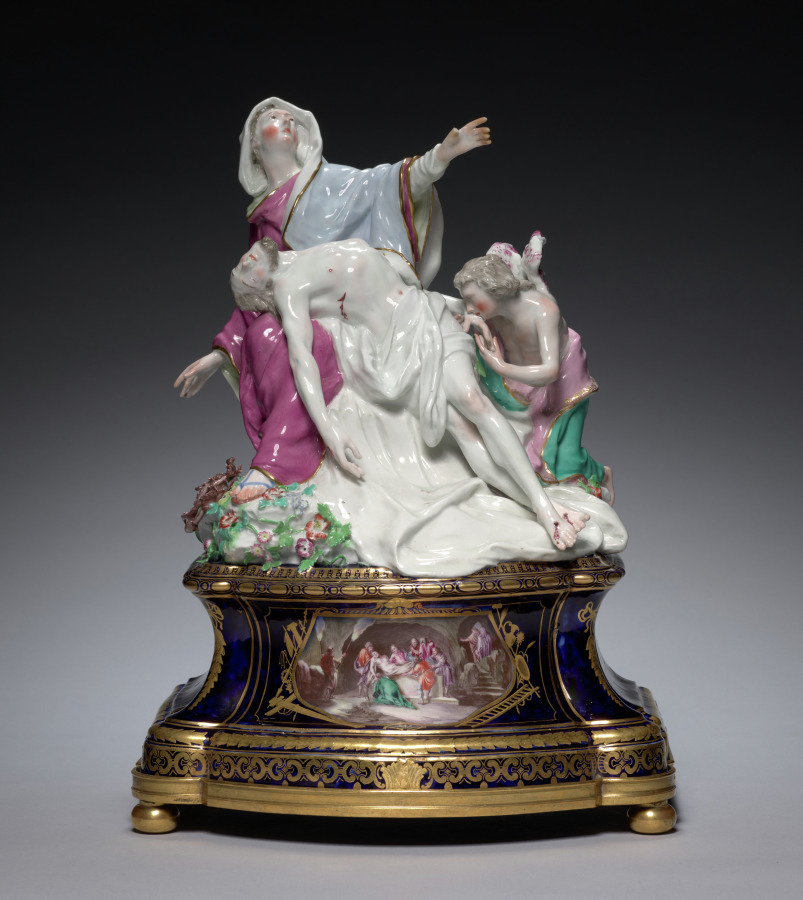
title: Figure of the Pietà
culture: England, London, Chelsea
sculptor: Joseph Willems (Flemish, 1715–1766)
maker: Chelsea Porcelain Factory (Britain, London, 1745–84)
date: c. 1761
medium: Soft-paste porcelain, painted in enamels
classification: Ceramic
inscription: Painted in gilt over the glaze at base of figure on the reverse: [a gold anchor]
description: The distinctively Roman Catholic subject of Mary cradling her son, the crucified Christ, suggests this figure was probably made for one of the aristocratic English families forced to practice their Catholicism in secret during the mid-1700s. Because of the laws banning Catholic worship in England, grand houses were often modified to include private chapels or rooms in private quarters where visiting priests delivered the sacraments in defiance of the laws favoring Protestant worship. A figure of this size and type likely would have served as an important devotional focal point within that context.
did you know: Only three examples of this figure by the Chelsea Porcelain Factory are known to exist.